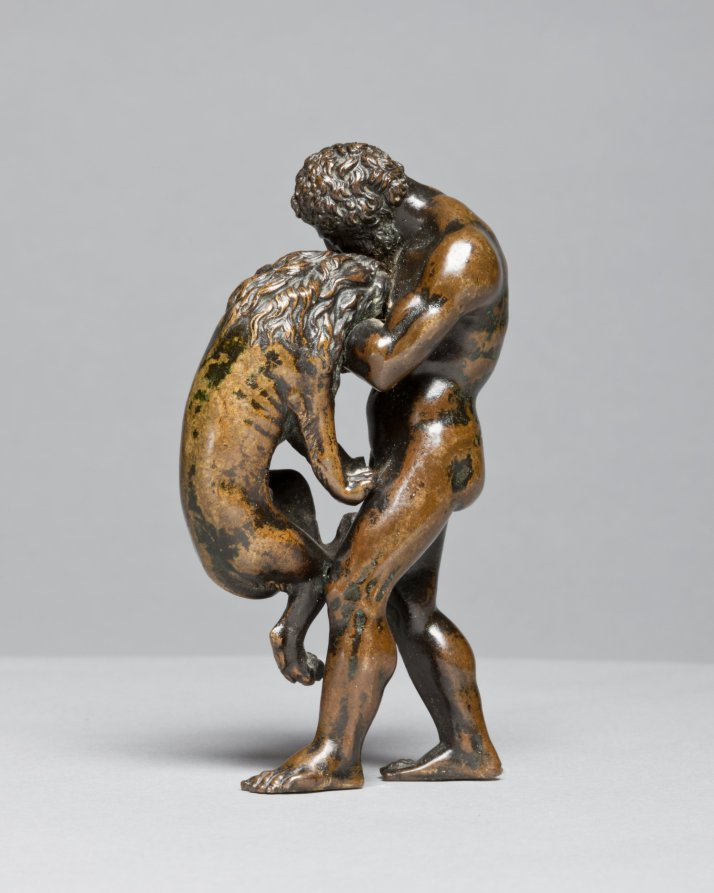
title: Hercules and the Nemean Lion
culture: Italy or France, 16th century or later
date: 1500s or later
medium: bronze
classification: Sculpture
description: The original owner of this work would have understood that this scene referred to the entire story of Hercules, the demi-god who had to accomplish twelve labors. The lion is named after the city of Nemea, near Corinth, a monstrous beast sent by the goddess Hera to wreak havoc on the area. After killing the lion, Hercules wore his pelt, commonly seen in other representations of the hero.